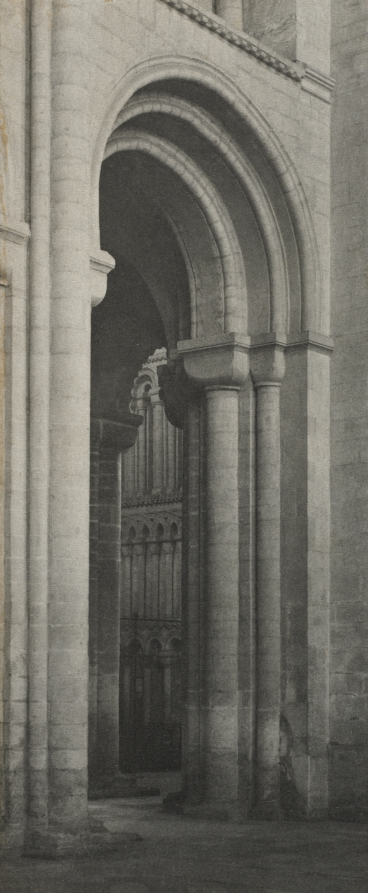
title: Ely Cathedral, Nave, Southwest Corner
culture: England, late 19th Century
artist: Frederick H. Evans (British, 1853–1943)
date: c. 1899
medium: platinum print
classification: Photograph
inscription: Written in pencil on verso: "Ely Cathedral Nave--S.W. Corner"; "$BBE"